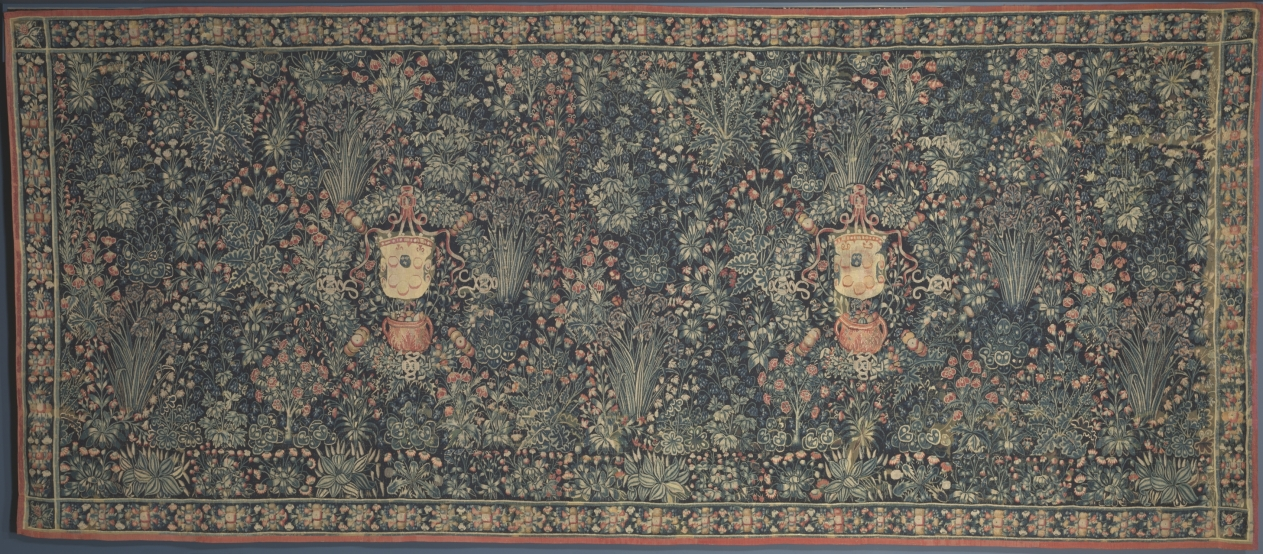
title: Millefleurs Tapestry with Medici Coat of Arms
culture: Netherlands, Hainault, early 16th century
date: 1520s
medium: tapestry weave: wool and silk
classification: Tapestry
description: Many identifiable flowering plants provide the French name, millefleur, for this pattern, which became fashionable around 1450. Each plant may have symbolized either religion, courtship, or morals. However, many millefleur tapestries, made for about 100 years, were probably not symbolic. Large quantities were woven only with flowers; some also incorporated birds and animals or, in this case, coats of arms. Here, the original coat of arms has been replaced by that of the Medicis, a prominent family in Renaissance Florence.